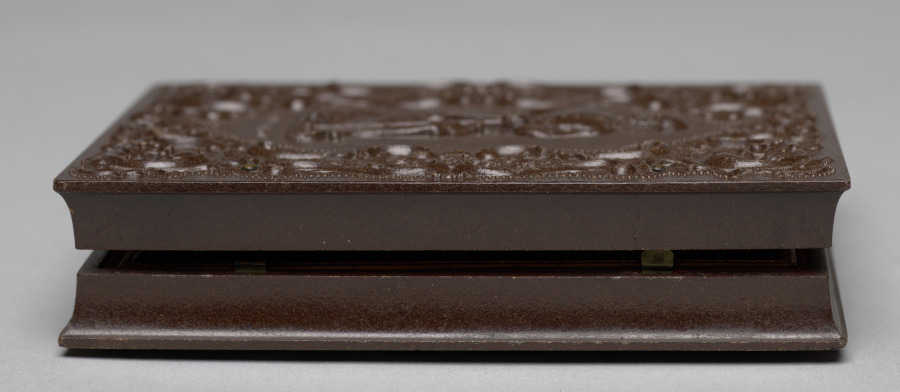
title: The Homework Table & Parents of Five Children Doing Homework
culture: America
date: c. 1858–60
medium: daguerreotype, quarter plate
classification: Photograph